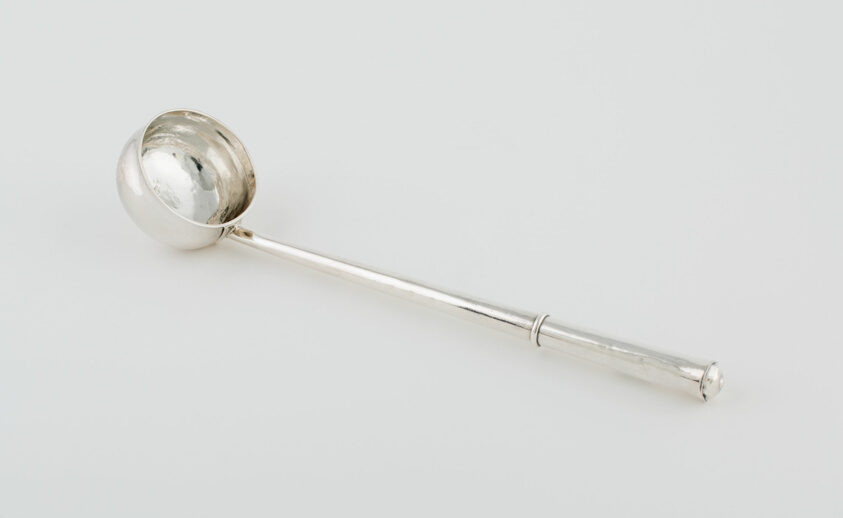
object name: Metalwork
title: Ladle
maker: William Looker; English, active 1719; London, England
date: 1719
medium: Sterling silver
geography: London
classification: silver; metalwork; european decorative arts